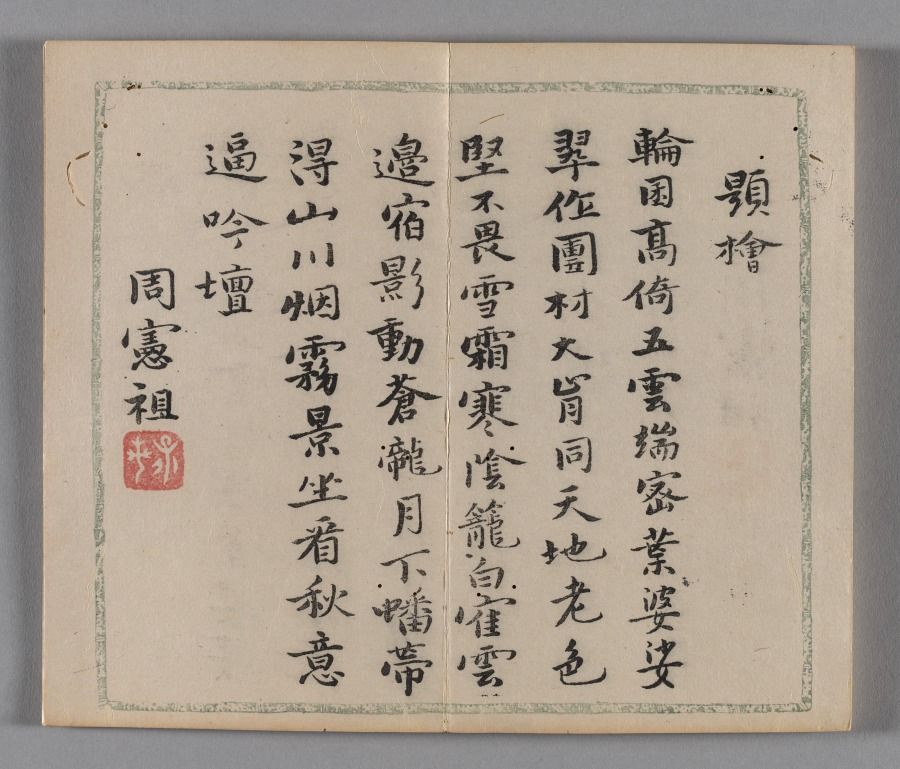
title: Ten Bamboo Studio Painting and Calligraphy Handbook (Shizhuzhai shuhua pu): Round Fans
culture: China, Qing dynasty (1644-1911)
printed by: Hu Zhengyan (Chinese, c. 1584–1674)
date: 1633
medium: Woodblock-printed book; ink and colors on paper; first edition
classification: Print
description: Color printing reached a level of perfection in the early 1600s, as seen in this Ten Bamboo Studio Collection of Calligraphy and Painting and the Mustard Seed Garden Manual of Painting (printed 1679 and 1701). The painterly quality, precision in registering (aligning) the woodblocks, and harmonious colors made them the most successful color print editions in Chinese history. Both editions were printed and compiled in Nanjing, spread nationwide, and had a great impact on the arts in Japan and Korea.